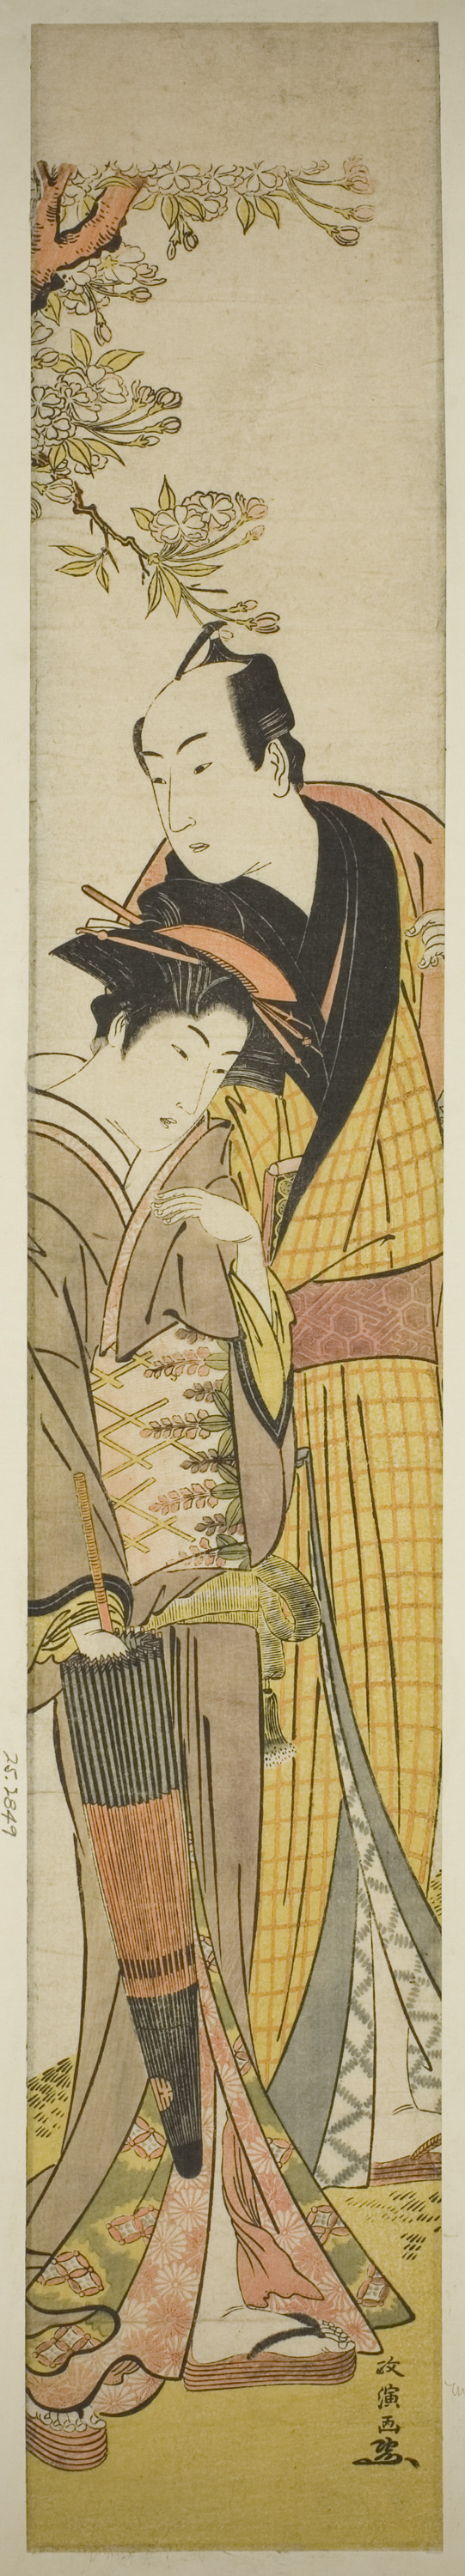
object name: Print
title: Young Couple under Cherry Tree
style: Japanese (culture or style)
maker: Kitao Masanobu (Santo Kyoden); Japanese, 1761–1816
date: c. 1781/89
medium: Color woodblock print; hashira-e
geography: Japan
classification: woodblock print; print; asian art